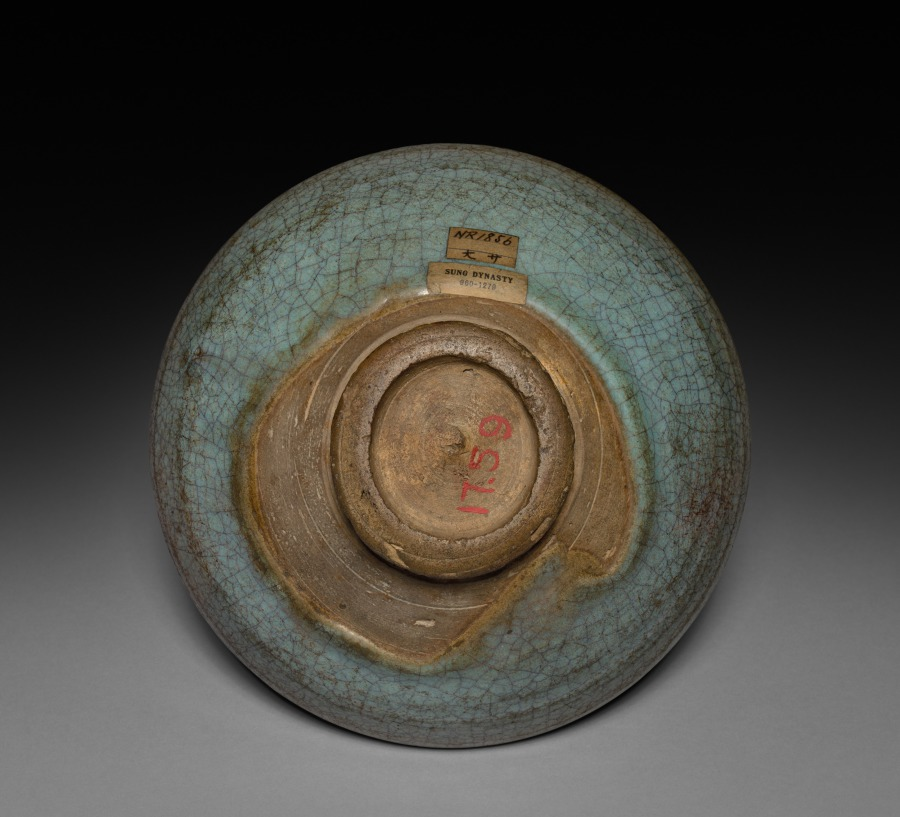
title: Bowl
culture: China, Yuan dynasty (1271-1368)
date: 1271–1368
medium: earthenware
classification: Ceramic